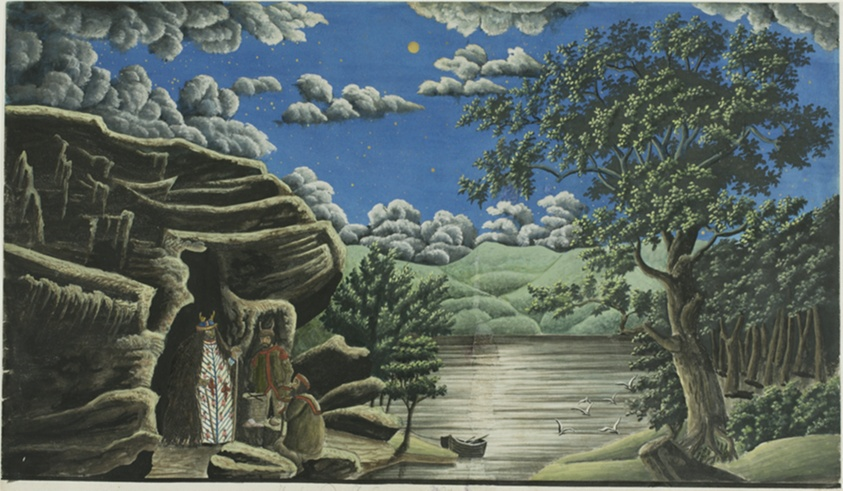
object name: Drawing and Watercolor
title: The Sorceress of the Yakuts in North East Asia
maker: Ernst Damitz (American, 1805-1883)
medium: Watercolor on paper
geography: United States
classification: watercolor; drawings (visual works); prints and drawing